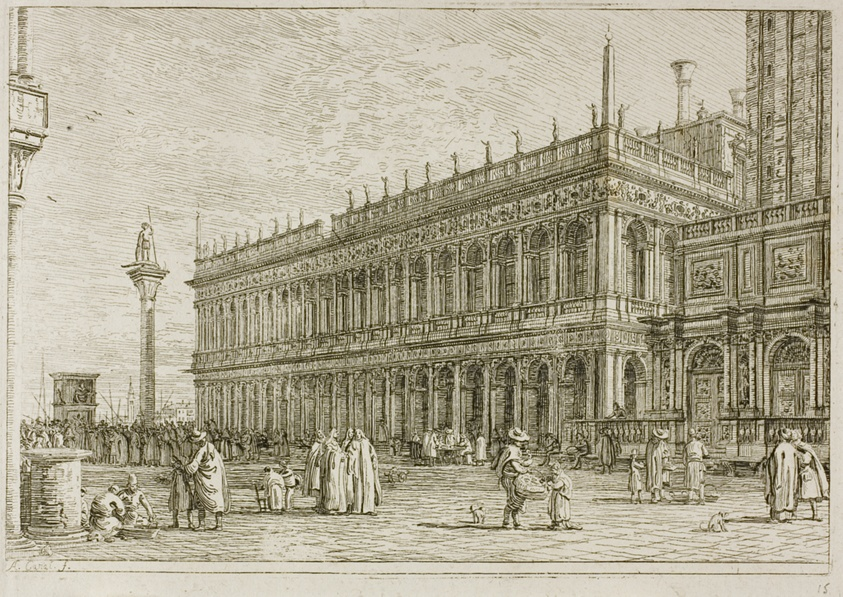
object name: Print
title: The Library, from Vedute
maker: Canaletto (Italian, 1697-1768)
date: 1735/44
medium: Etching in black on ivory laid paper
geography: Italy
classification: etching; print; prints and drawing